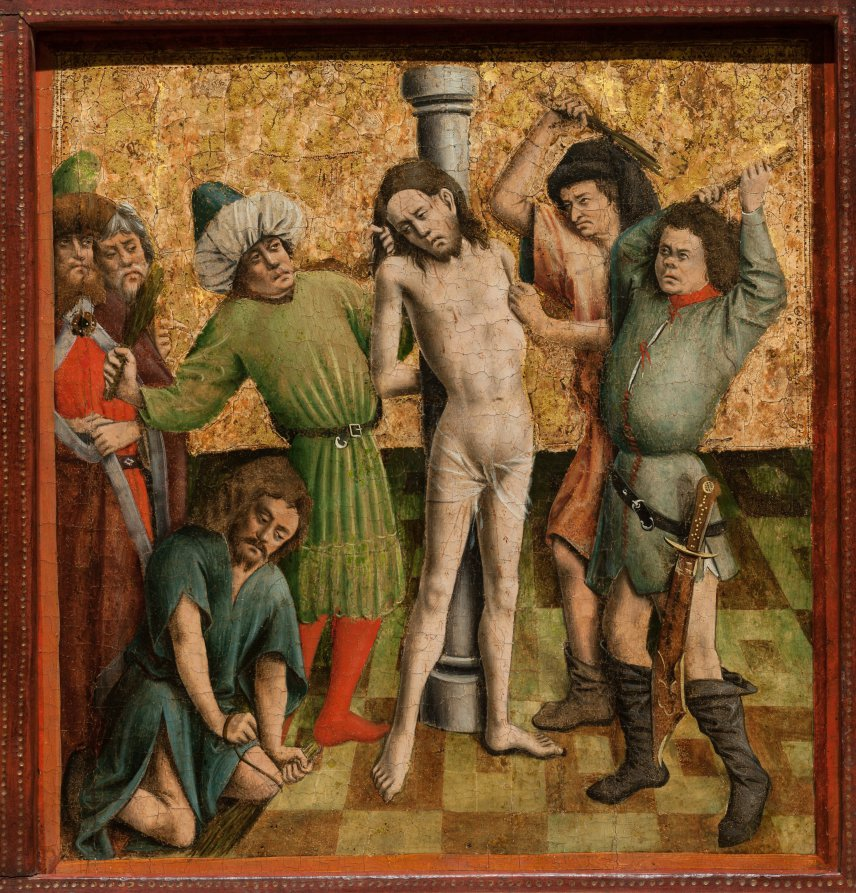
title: Altarpiece with The Passion of Christ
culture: Germany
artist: Master of the Schlägl Altarpiece (German)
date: c. 1440s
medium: oil and gold on wood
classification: Painting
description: The visual focus of this altarpiece is the suffering and death of Christ on the cross. So-called Passion cycles in art include the events leading up to and following the Crucifixion, not only as single subjects but as scenes meant to be read in sequence. Passion cycles were promoted by the two great teaching orders, the Franciscans and the Dominicans, for whom this subject represented the main religious drama of their churches, and also by the German mystics who advocated private contemplation on the humanity and suffering of Christ. The original context for this altarpiece remains unknown, but it was probably made for a religious institution in Westphalia in the Rhine Valley. During the 1870s it was given to the Abbey of Schlägl, near Linz in Upper Austria, from which both altarpiece and artist take their names. The altarpiece is not preserved today in its original format, and some of the individual scenes are missing. Scholars continue to debate the original number of scenes and their sequencing; nine of the original panels have survived.